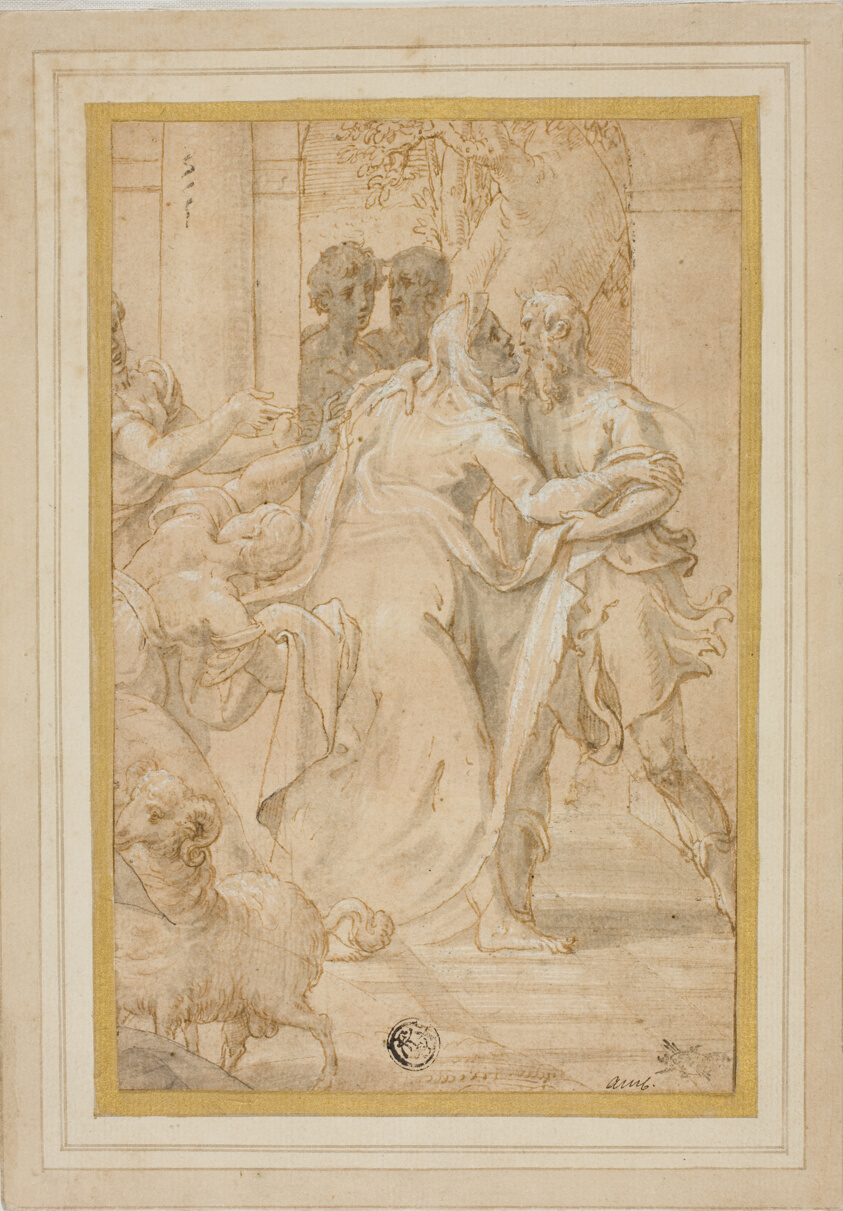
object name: Drawing and Watercolor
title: The Meeting of Joachim and Anna at the Golden Gate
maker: Girolamo Mazzola Bedoli (Italian, c. 1510-c. 1569)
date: c. 1553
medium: Pen and brown ink with brush and gray wash, heightened with lead white, on tan laid paper, laid down on ivory laid card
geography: Italy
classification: pen and ink drawings; drawings (visual works); prints and drawing